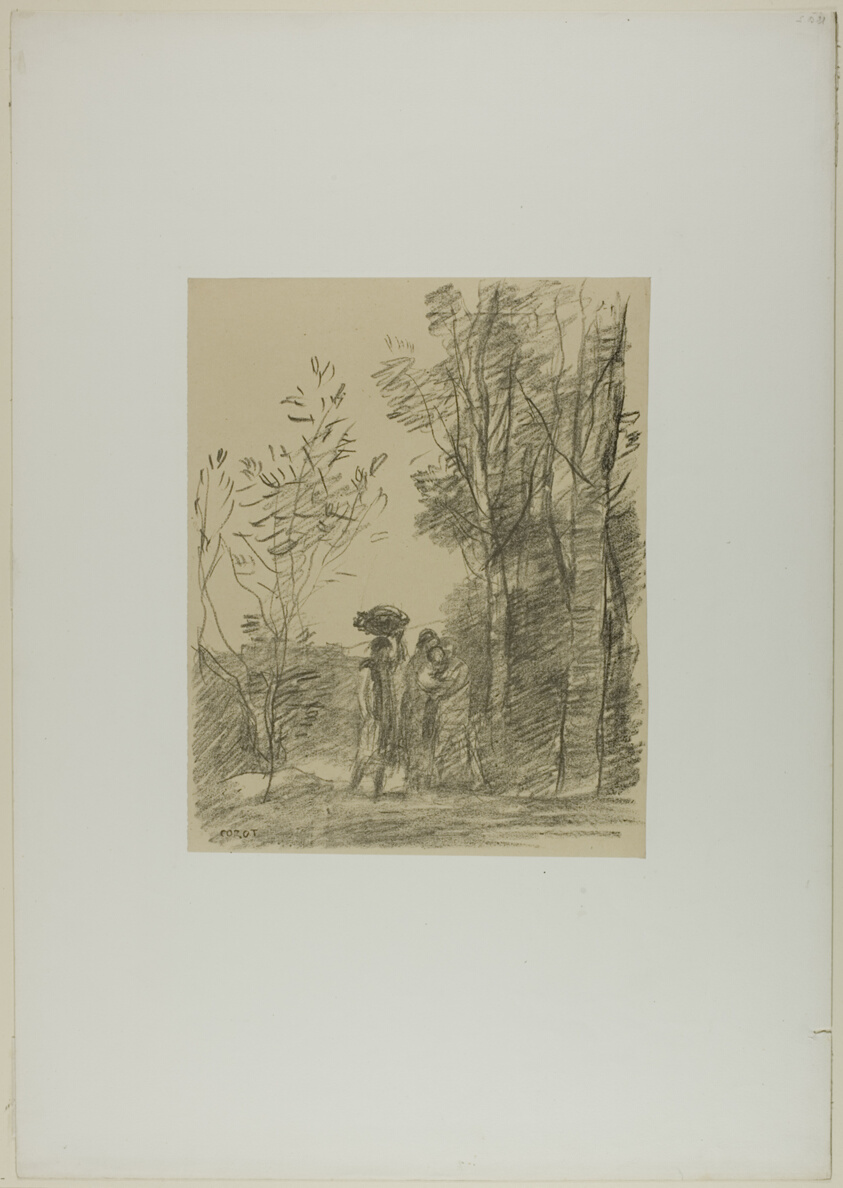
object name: Print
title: The Meeting in the Woods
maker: Jean-Baptiste-Camille Corot; French, 1796-1875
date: 1871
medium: Transfer lithograph on cream China paper laid down on white wove paper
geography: France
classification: lithograph; print; prints and drawing